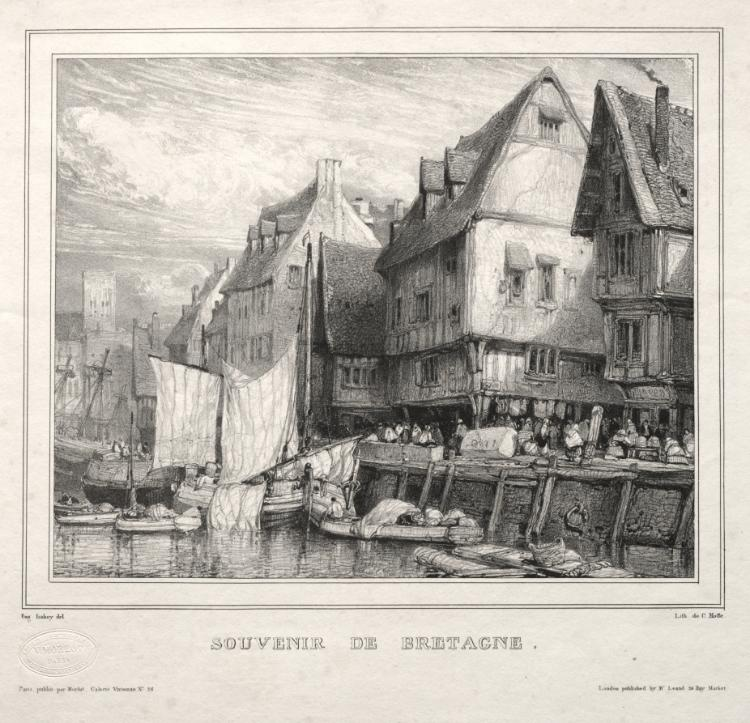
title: Souvenirs: Souvenir of Brittany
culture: France, 19th century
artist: Eugène Isabey (French, 1803–1886)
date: 1832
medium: lithograph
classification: Print